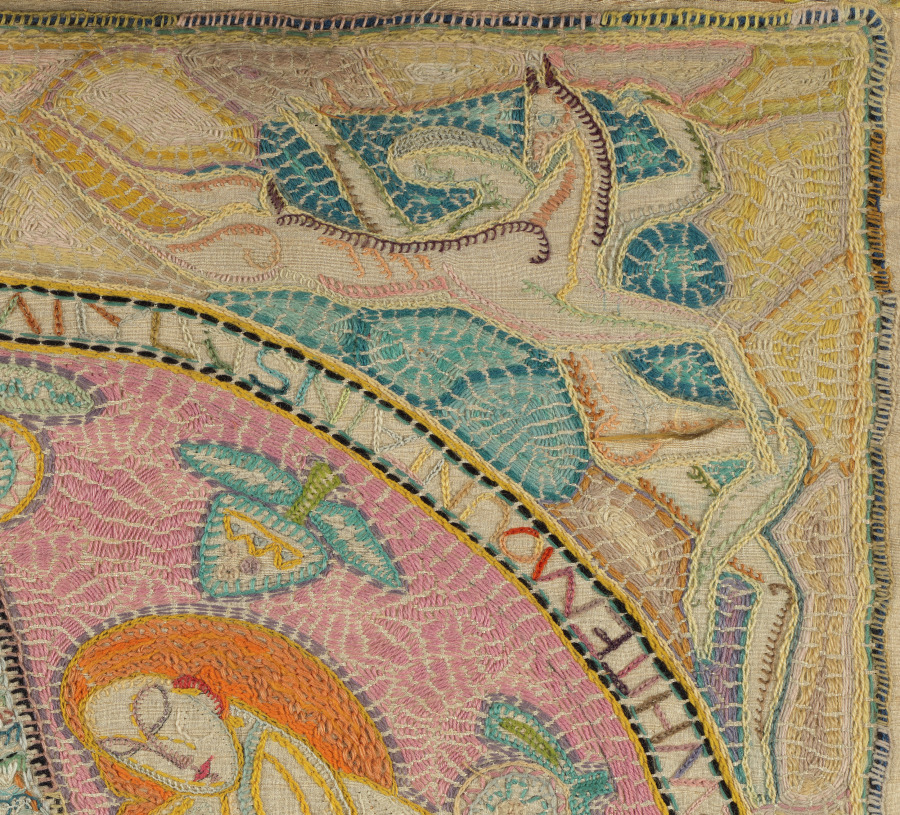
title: The Family (In Memory of a Summer in the White Mountains)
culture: America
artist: Marguerite Zorach (American, 1887–1968)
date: 1917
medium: plain weave silk; wool embroidery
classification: Embroidery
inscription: THE FAMILY / DONE BY MARGUERITE ZORACH IN THE YEAR NINETEEN HUNDRED AND SEVENTEEN IN MEMORY OF A SUMMER IN THE WHITE MOUNTAINS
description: Marguerite Zorach conceived her large, complex embroideries as major artistic statements at a time when the medium was routinely considered “craft,” as opposed to “fine art.” In doing so, she helped to erase such distinctions. One of her most acclaimed works, this example celebrates humanity in harmony with nature, presenting the artist, her husband (a Cleveland-raised sculptor named William Zorach), and their son amid an evergreen tree and four pairs of animals. Very time consuming to create, Zorach’s embroideries are rare.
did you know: In 1925, Zorach served as first president of the New York Society of Women Artists, an organization still in existence.